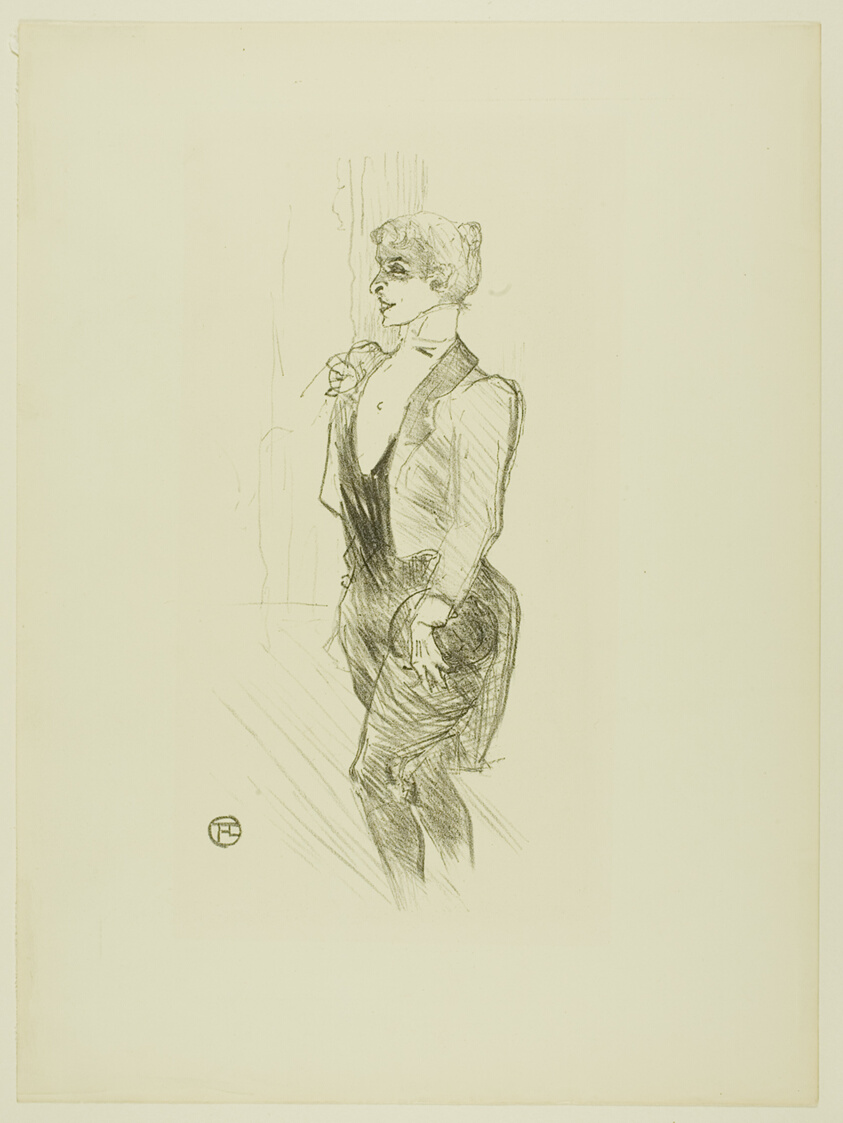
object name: Print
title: Mary Hamilton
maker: Henri de Toulouse-Lautrec (French, 1864-1901)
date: 1894, published before 1925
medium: Lithograph on cream wove paper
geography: France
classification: lithograph; print; prints and drawing